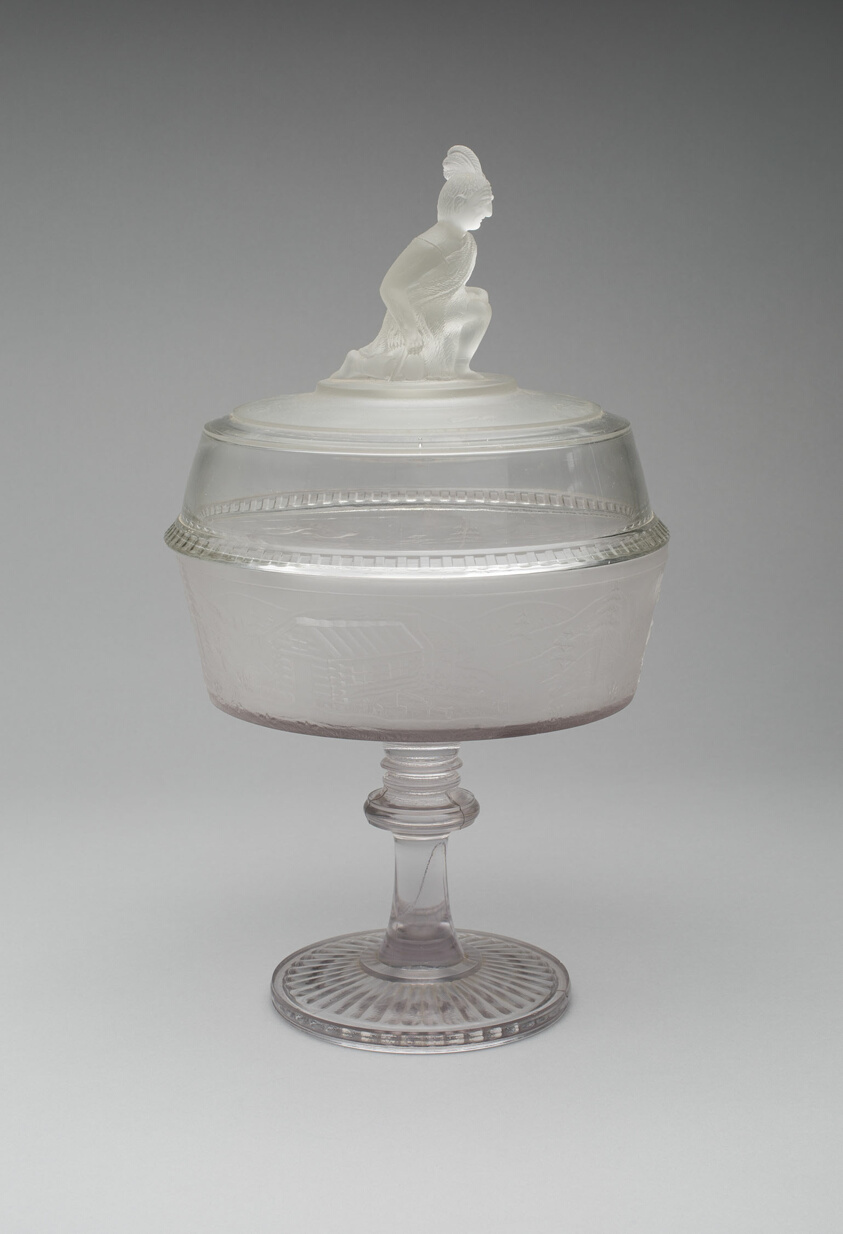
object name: Glass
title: Covered Compote in the Pioneer Pattern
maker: Gillinder and Sons, 1861–c. 1930; Philadelphia or Greenbsburg, Pennsylvania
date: c. 1870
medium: Glass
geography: Philadelphia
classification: compote; glass; vessel for serving food; american decorative arts; american arts; decorative arts